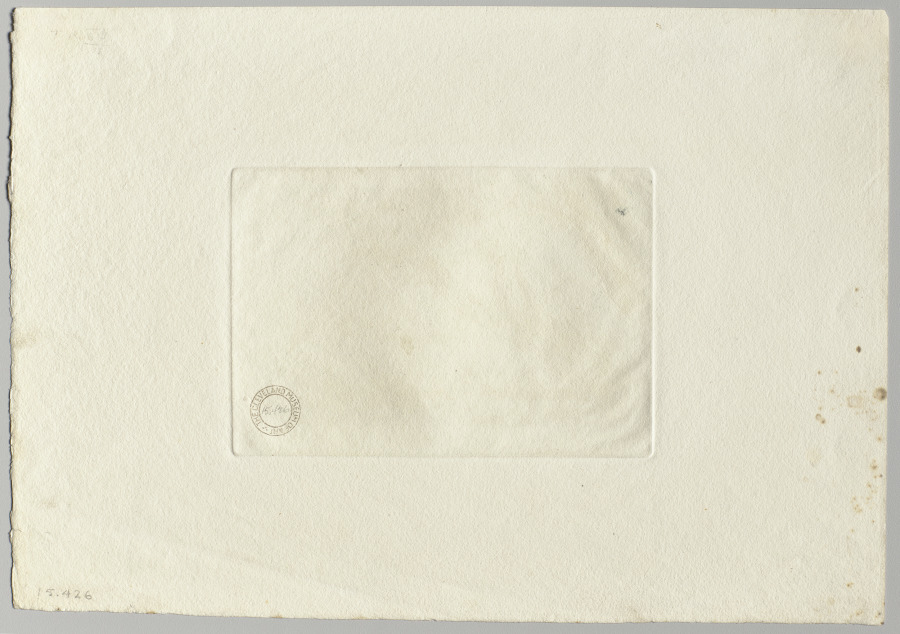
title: Lake Erie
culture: America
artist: Otto H. Bacher (American, 1856–1909)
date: 1878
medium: etching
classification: Print